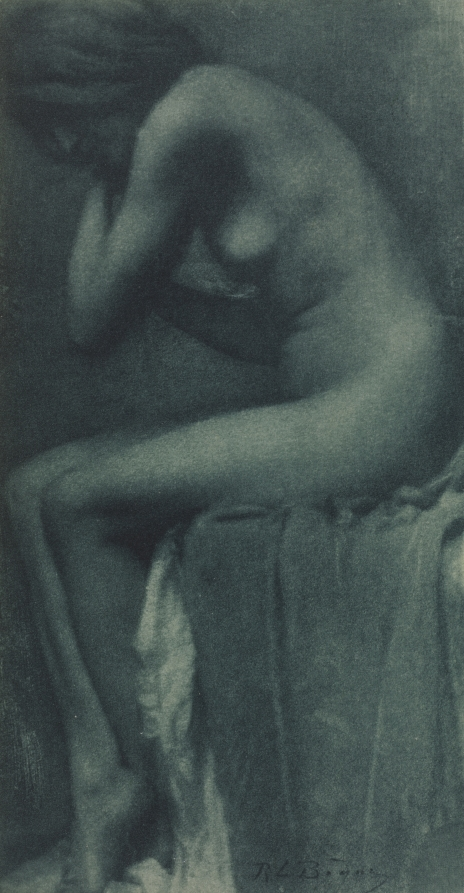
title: Camera Work: Study [Nude]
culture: France, 20th century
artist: René Le Bègue (French, 1857–1914)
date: 1906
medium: photogravure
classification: Bound Volume